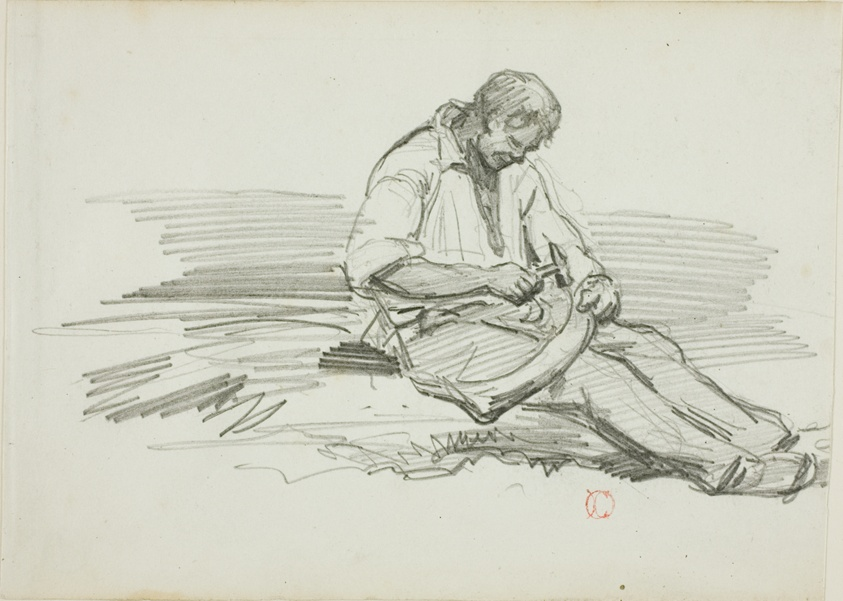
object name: Drawing and Watercolor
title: Man Mending Scythe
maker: Charles François Daubigny (French, 1817-1878)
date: c. 1862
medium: Graphite on ivory wove paper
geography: France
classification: graphite; drawings (visual works); prints and drawing